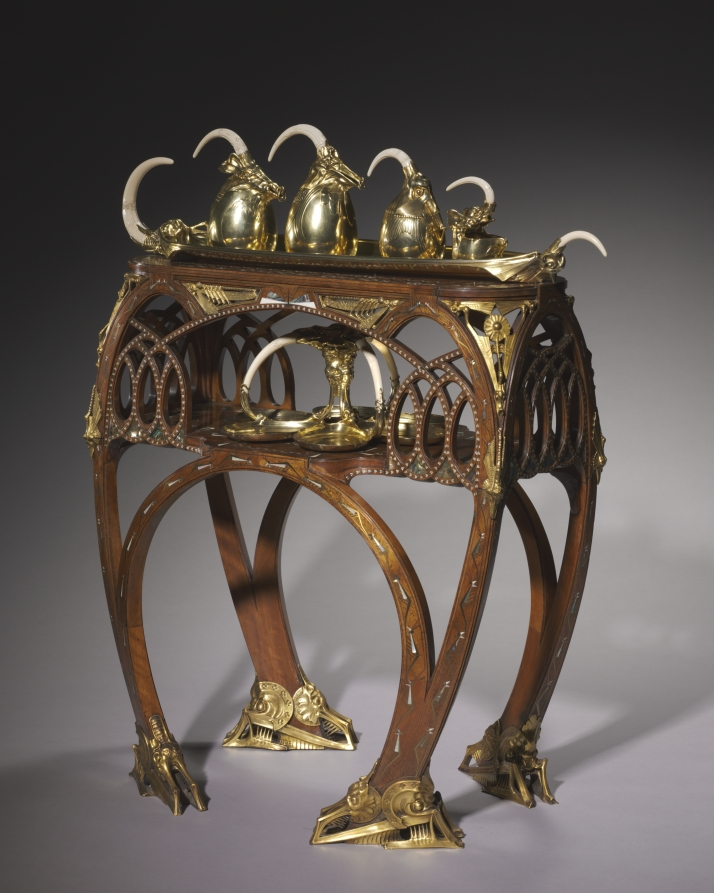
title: Salver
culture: France, Paris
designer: Carlo Bugatti (Italian, 1856–1940)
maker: Adrien-Aurélien Hebrard (French, 1866–1937)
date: c. 1907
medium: Gilt silver and ivory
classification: Silver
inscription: inscribed inside one of six ovoid compartments: "Bugatti" in ligature. Engraved on back: A.A. HEBRAND/ 8 RUE ROYAL/PARIS FRANCE.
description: This tea and coffee service, salver, and table, together with some now missing cups, were all designed by Carlo Bugatti as an ensemble and presented at the 1902 exposition devoted to decorative arts in Turin, Italy. The set was probably acquired from Bugatti's 1907 exhibition at the Galerie Hébrard in Paris by a wealthy South African widow, Anna Blake, who was living there at the time. Some of the animal and insect motifs suggest mythical beasts or the fossils of prehistoric animals. When Mrs. Blake returned to Cape Town, she took these and other pieces designed by Bugatti with her, and they remained in South Africa throughout her lifetime.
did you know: Carlo Bugatti's sons achieved illustrious careers of their own. Rembrandt Bugatti (1884-1916) became a celebrated sculptor, and Ettore Bugatti (1881-1947) manufactured luxurious automobiles and racing cars.